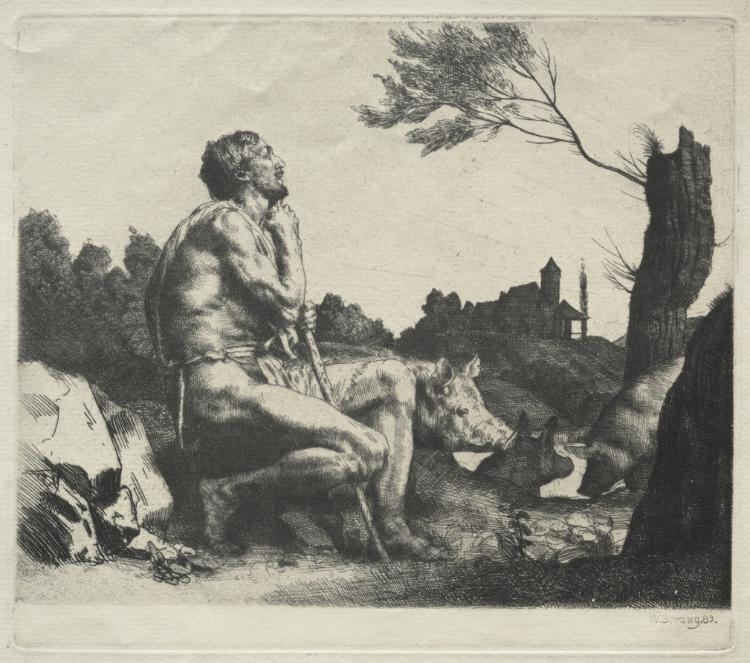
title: The Prodigal Son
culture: England, 19th century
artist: William Strang (British, 1859–1921)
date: 1882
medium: etching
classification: Print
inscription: artist's signature inscribed in plate below image: W. Strang 82. (l.r)